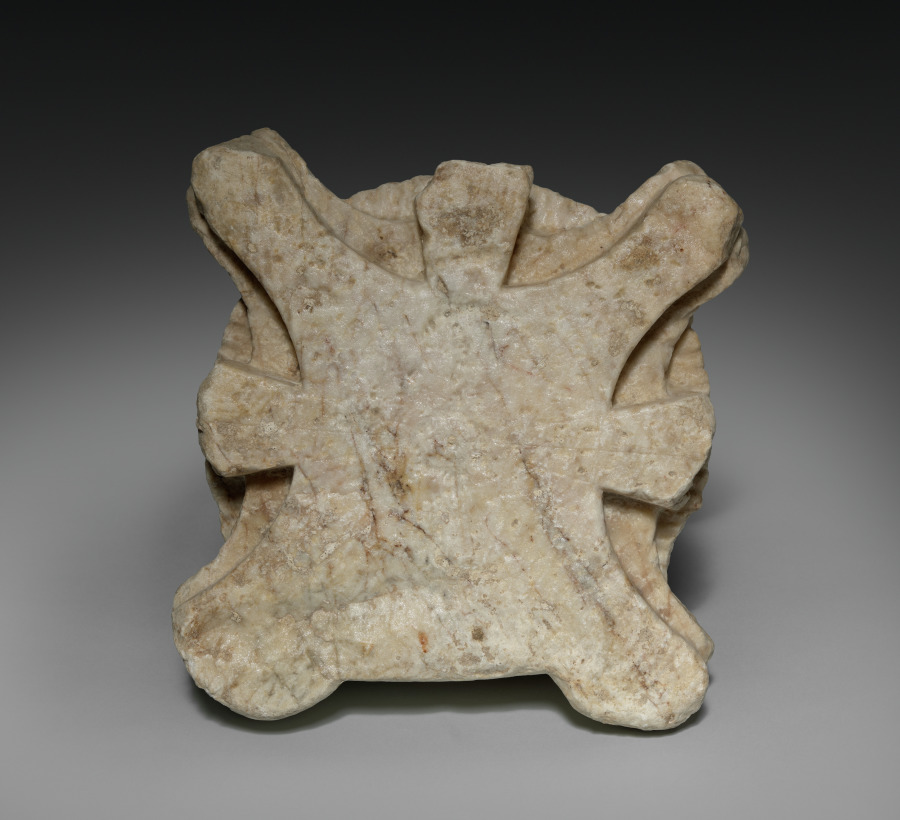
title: Column Capital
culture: Spain, Cordoba, Madinat al-Zahra, Spanish Umayyad period (756–1031)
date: c. 960–76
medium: Marble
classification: Sculpture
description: This capital comes from the palatial city of Madinat al-Zahra near Cordoba (Spain) which was begun by caliph Abd al-Rahman III (r. 912–61) around 936. Large parts of the Iberian Peninsula were then under Islamic rule and experienced a cultural flowering. The city, destroyed already in 1010, was the most magnificent palace complex in Europe at the time.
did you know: In the mid-1800s the ruins of Madinat al-Zahra were rediscovered and became the source of great fascination as people imagined a palace like that in the stories of One Thousand and One Nights.